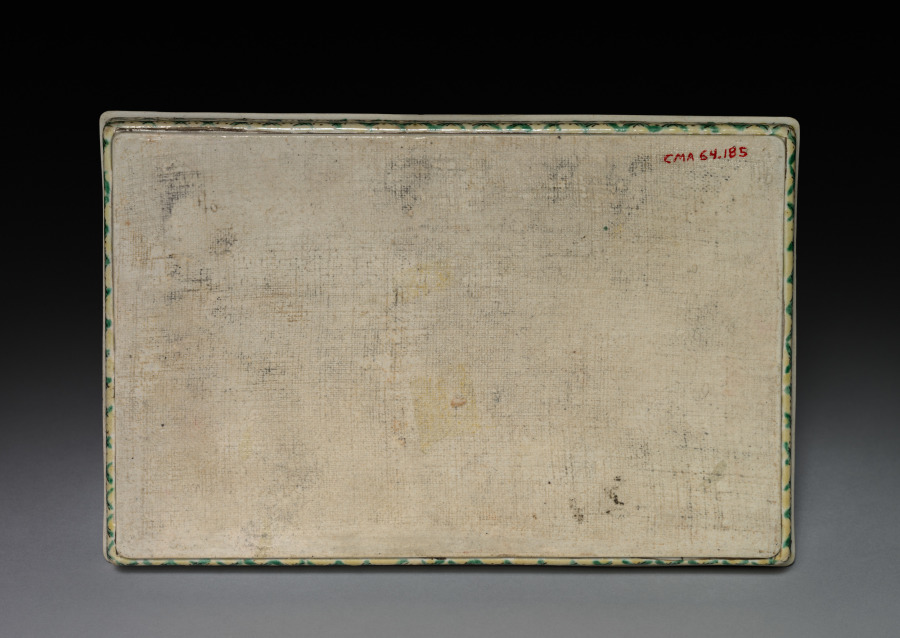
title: Tray with Phoenixes in Landscape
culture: China, Jiangxi province, Jingdezhen kilns, Qing dynasty (1644-1911), Kangxi reign (1662-1722)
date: 1662–1722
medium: porcelain with incised and sancai (3-color) enamel decoration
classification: Ceramic